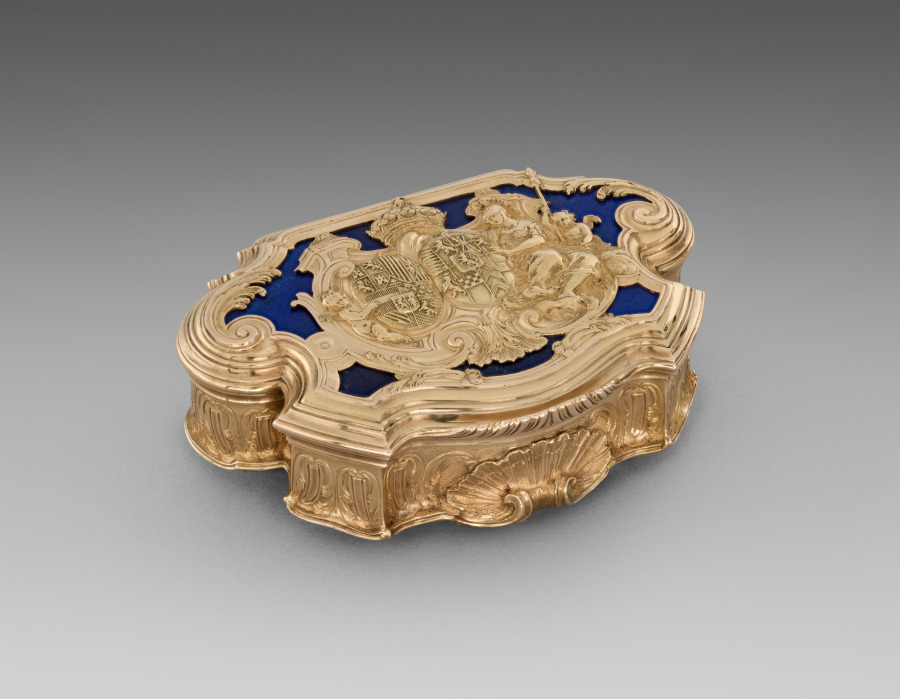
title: Gold Box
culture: France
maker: Juste-Aurèle Meissonnier (French, 1695–1750)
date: 1728–29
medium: gold and lapis lazuli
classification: Metalwork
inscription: IOM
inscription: a crowned M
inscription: a crowned dolphin's head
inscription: a crowned chancellor's mace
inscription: double frame eagle's head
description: With its central cartouche, heavy molding, and fluted sides, the design of this box attests to Juste-Aurèle Meissonnier’s interest in architecture. The box is further distinguished by a strong sense of movement, achieved through its dynamic contour, extraordinary level of detail, and the dramatic contrast between gold and lapis lazuli. Such small boxes, known as snuffboxes, were used to hold scented powdered tobacco that was inhaled through the nostrils. Made of precious materials and highly ornamented, they conveyed the owner’s wealth, fashion awareness, sophistication, and social standing. These personal, collectible items were often presented as luxurious gifts. This box was made for the dowager Queen of Spain, Maria Anna of Neuburg, whose coat of arms – along with that of her late husband, Charles II – features on the cover.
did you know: This is one of the two known objects that bear the maker's mark of Meissonnier.